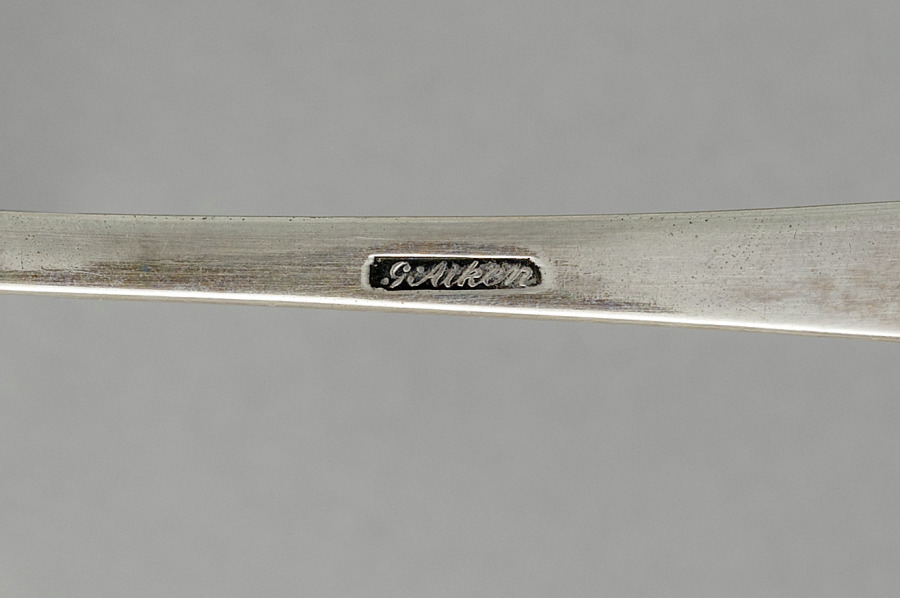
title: Ladle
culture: America, Maryland, Baltimore, late 18th Century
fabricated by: George Aiken (American, 1765–1832)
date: c. 1790–1800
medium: silver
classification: Silver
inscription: engraved "B" in bright-cut script on top of handle end.